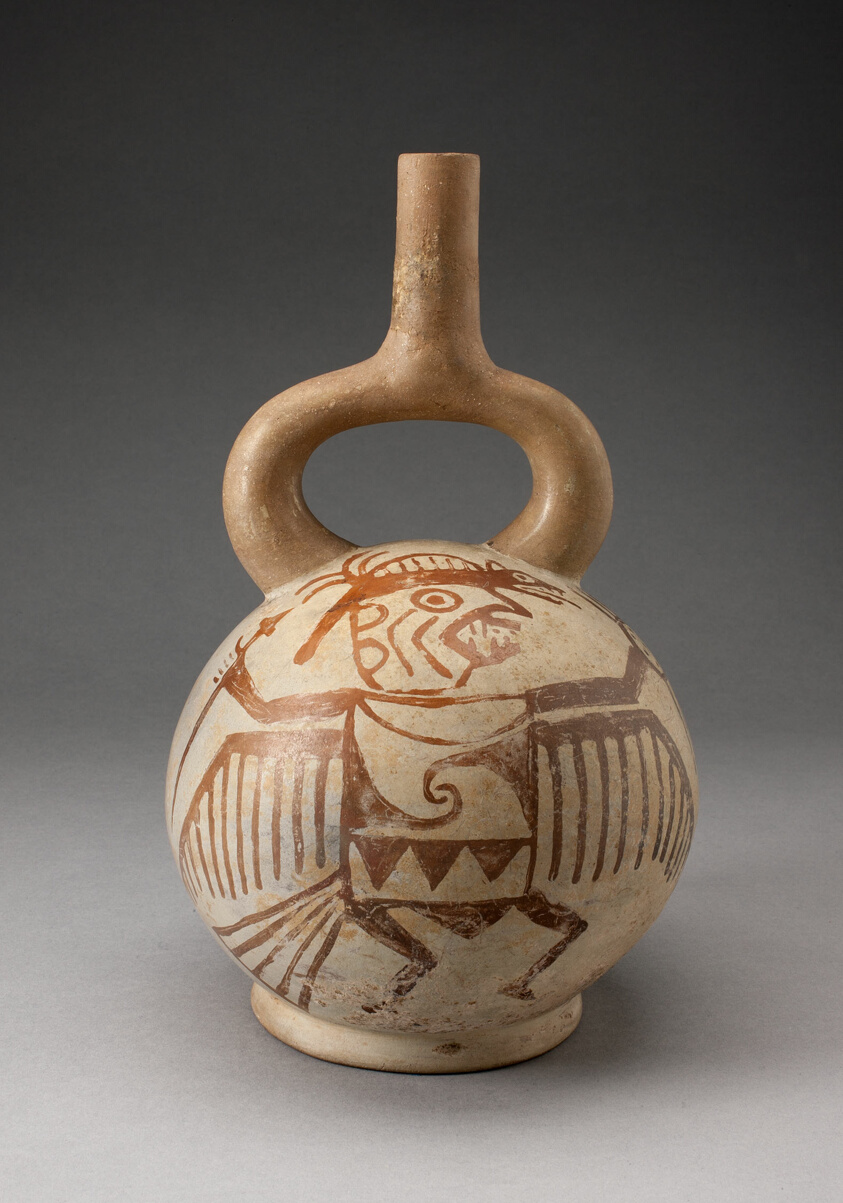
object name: Vessel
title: Stirrup Spout Vessel with Fineline Bird Warrior Motifs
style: moche, Arts of the Americas, andes, south american, andean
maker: Moche (North coast, Peru)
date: 100 BCE–500 CE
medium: Ceramic and pigment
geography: Peruvian North Coast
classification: earthenware; ceramics; vessel; art of the americas